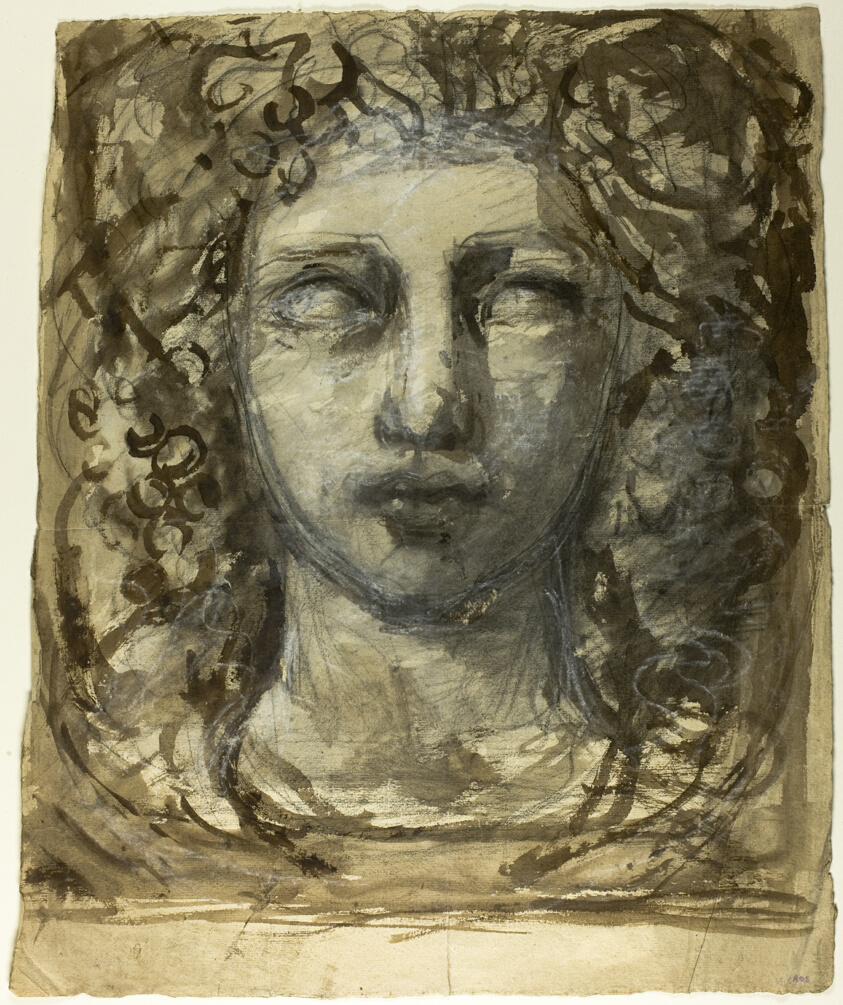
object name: Drawing and Watercolor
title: Study of Female Head (recto); Classical Male Head (verso)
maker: Henri Cros (French, 1840-1907)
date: c. 1890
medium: Brush and brown and gray wash, with black chalk, heightened with white chalk (recto), and black chalk (verso), on cream laid paper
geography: France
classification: ink or chalk wash; drawings (visual works); prints and drawing